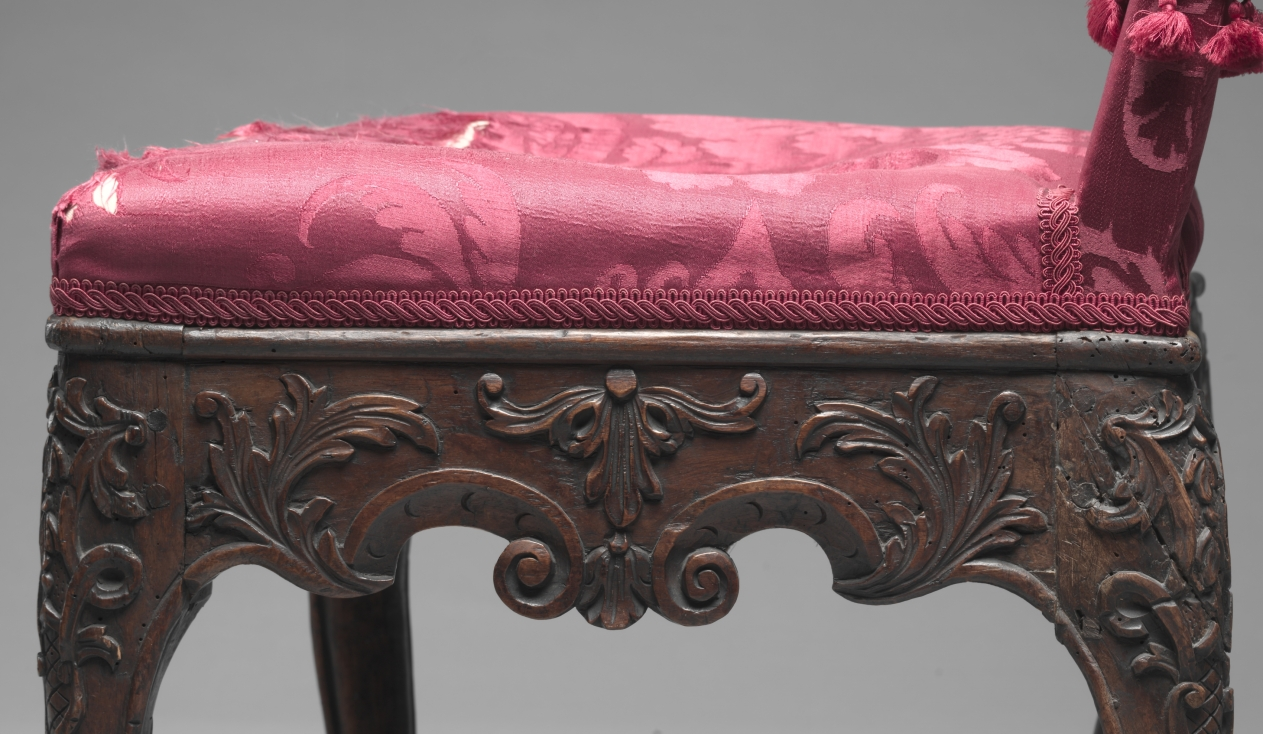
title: Side Chair (2 of 2)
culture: Germany, Belgium, or the Netherlands, early 18th century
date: early 1700s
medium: walnut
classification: Furniture and woodwork